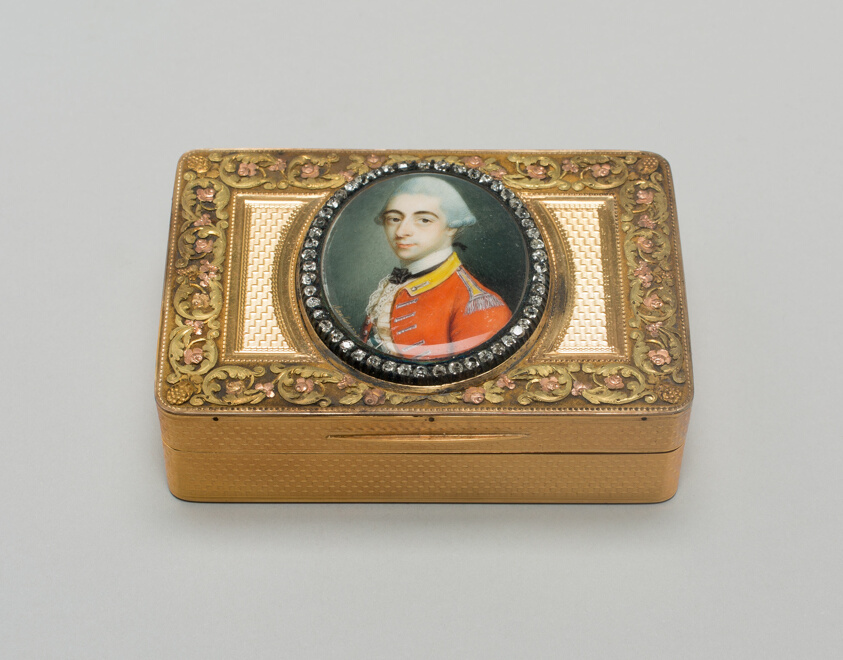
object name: Metalwork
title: Snuff Box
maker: James Scouler; English, 1741-1812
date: 1818/19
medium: Gold and enamels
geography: London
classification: snuff box; european decorative arts; metalwork